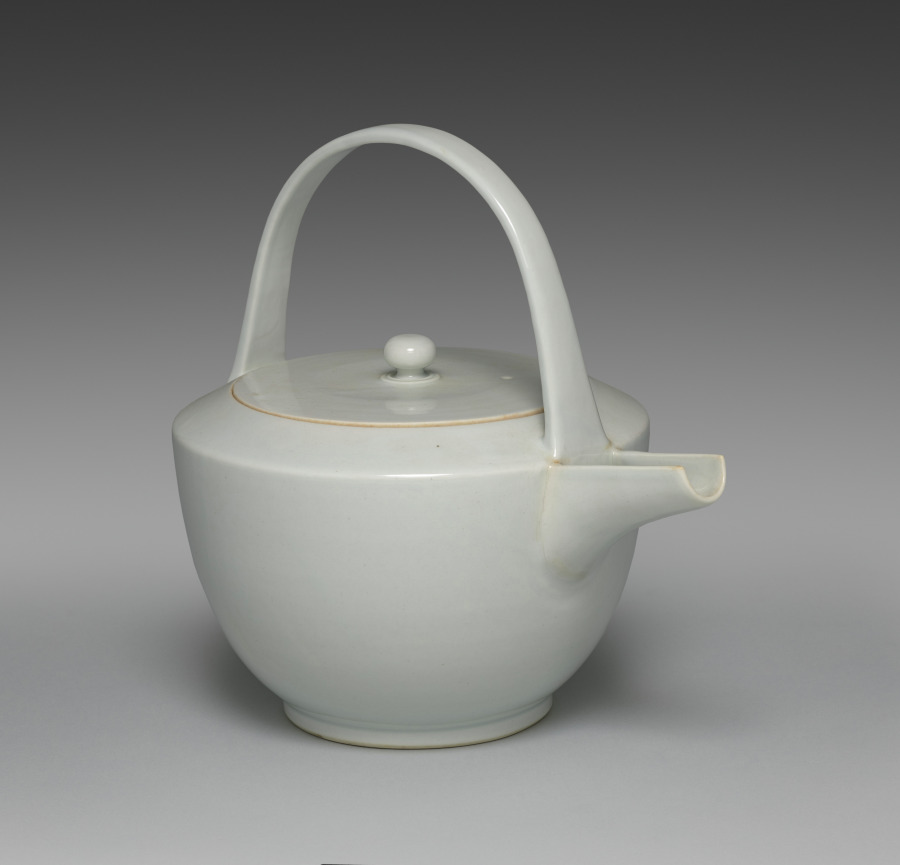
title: Sake Pourer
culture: Japan, Meiji period (1868–1912)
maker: Seifū Yohei III (Japanese, 1851–1914)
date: c. 1887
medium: Porcelain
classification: Ceramic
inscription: Artist's signature in underglaze blue on the base.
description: This sake pourer has a wide basin with a low foot; a generous spout open across the top half; a flat, round lid with a small knob recessed flush to the top of the container; and a tall, arched handle that meets the container where the top joins the basin at a sharp angle. This vessel is glazed but otherwise undecorated. Unlike the creamy white color of some Yohei III works, the white of this sake pourer has the bluish cast typical of porcelains produced in Kyoto.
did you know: Seifū Yohei III signed this sake pourer in underglaze blue on the base.